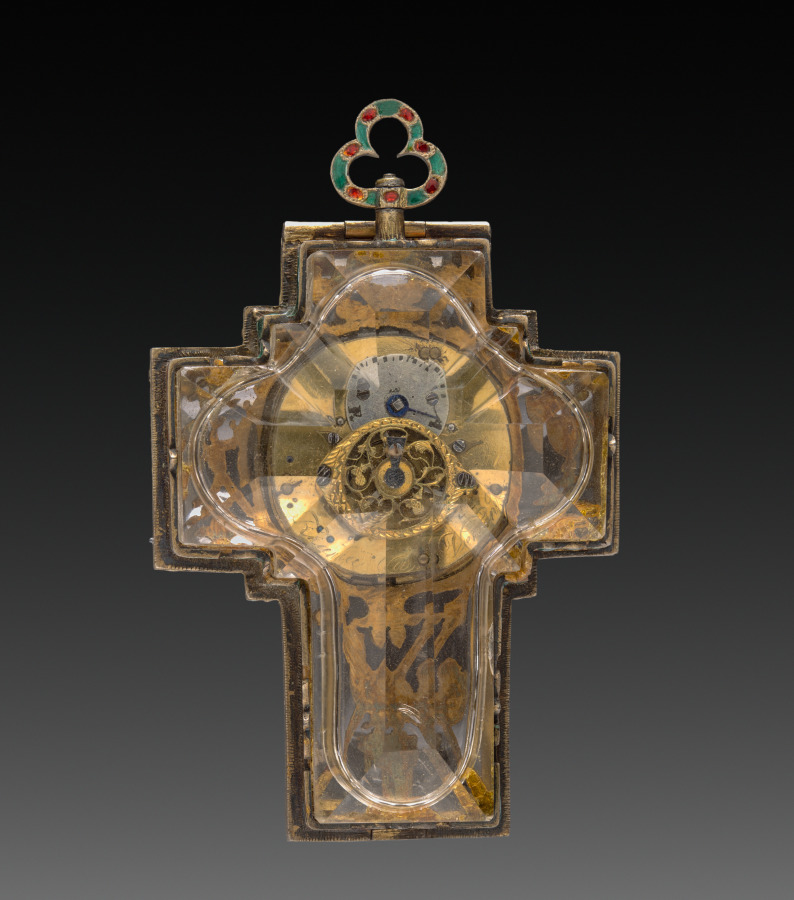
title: Watch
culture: Austria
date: 1800s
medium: crystal, gilt metal, enamel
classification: Jewelry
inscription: movement inscribed in ligature: "Ranna a Vienne."